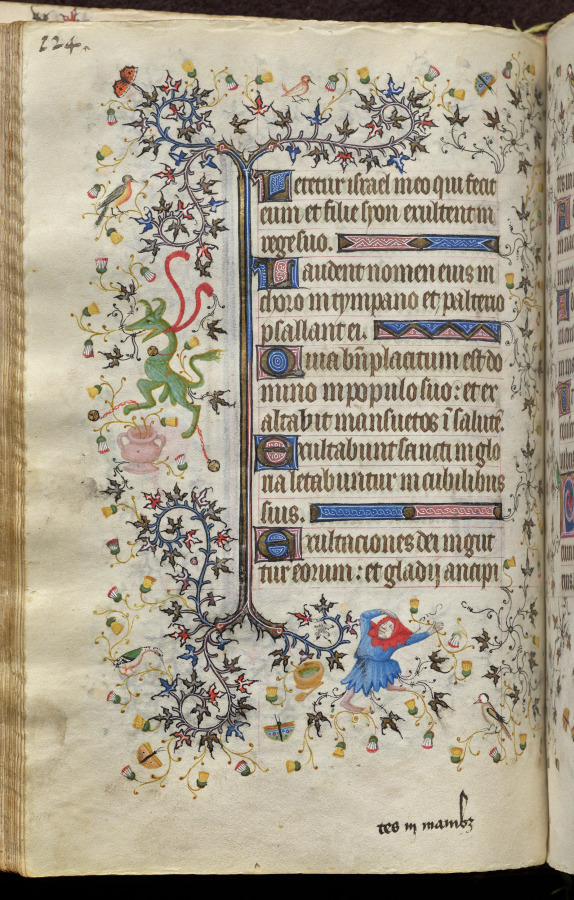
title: Hours of Charles the Noble, King of Navarre (1361-1425): fol. 62v, Text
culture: France, Paris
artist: Master of the Brussels Initials and Associates (French)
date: c. 1405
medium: ink, tempera, and gold on vellum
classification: Bound Volume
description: This precious volume was obviously highly prized by its owner, the French-born King of Navarre, who had his coat of arms painted on no less than twenty folios. Rather than directly commissioning this manuscript from a specific workshop, it seems that Charles the Noble acquired his book of hours -- perhaps ready-made for the luxury market -- while on a trip to Paris in 1404-05. A collaborative effort, six painting styles are evidenced within the pages of this codex, those of two Italians, two Frenchmen, and two Netherlanders. The painter who was responsible for the planning and decoration of the book, and who produced seventeen of the large miniatures, was a Bolognese artist known as the Master of the Brussels Initials. His principal assistant, responsible for most of the borders, was a Florentine who signed his name "Zecho" da Firenze on folio 208 verso.